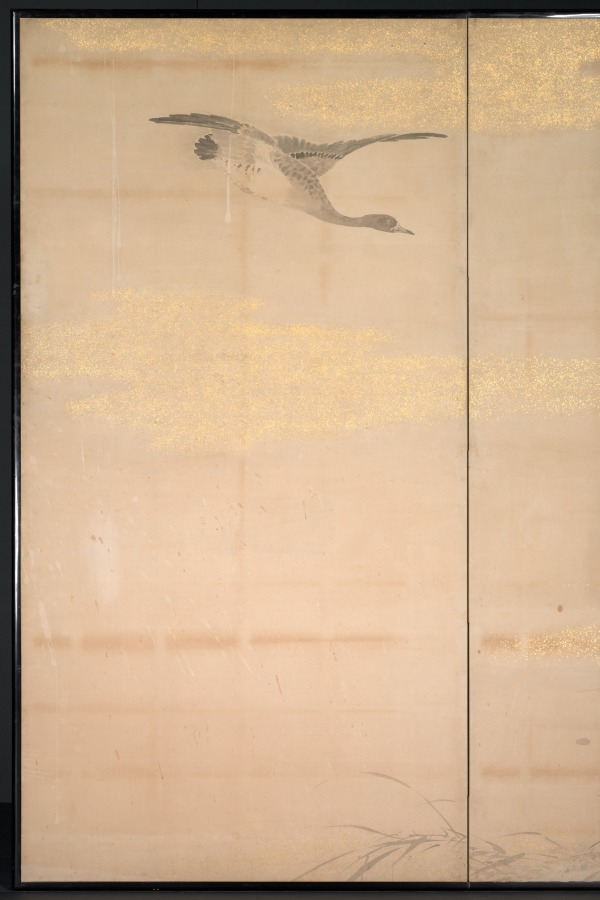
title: Geese, Reeds, and Water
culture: Japan, Edo period (1615–1868)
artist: Yamamoto Baiitsu (Japanese, 1783–1856)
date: 1800s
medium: One of a pair of four-panel folding screens; ink, color, and cut gold foil on paper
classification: Painting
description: This byōbu composition differs from most in that it comprises two four-panel screens, rather than two six-panel units. Since the current mounting is modern, it is impossible to determine whether its present configuration represents its original design. Some panels may have been removed to help the screens better fit into a modern interior space. Baiitsu worked almost exclusively in monochromatic ink tones and favored classical Chinese painting themes.